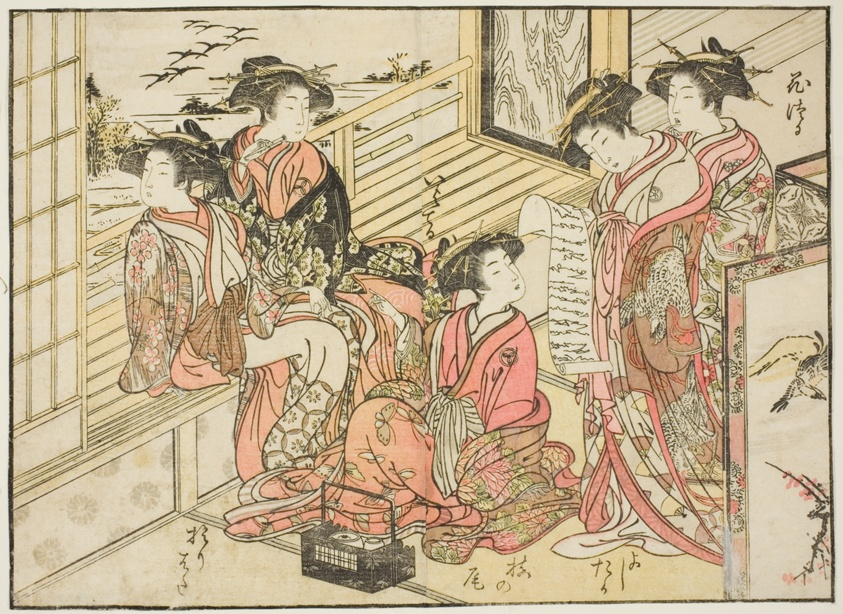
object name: Print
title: Courtesans of Okamoto, from the book "Mirror of Beautiful Women of the Pleasure Quarters (Seiro bijin awase sugata kagami)," vol. 2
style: Japanese (culture or style)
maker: Katsukawa Shunsho; Japanese, 1726-1792; Kitao Shigemasa; Japanese, 1739-1820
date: 1776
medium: Color woodblock print; double-page illustration cut from a book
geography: Japan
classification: woodblock print; print; asian art